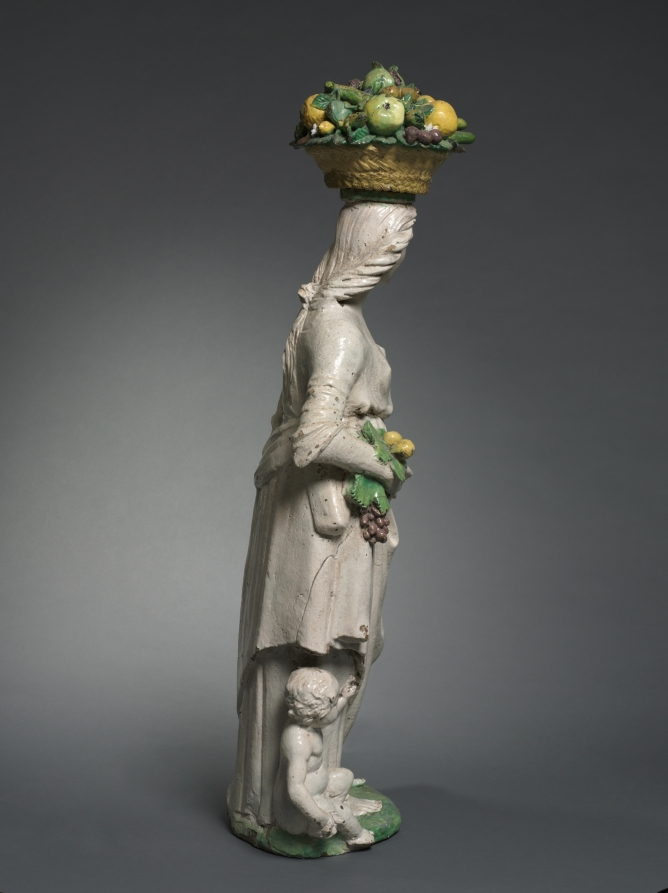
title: Dovizia (Plenty)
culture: Italy, Florence, 16th century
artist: Giovanni della Robbia (Italian, 1469–1529/30)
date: c. 1520–29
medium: glazed terracotta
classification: Sculpture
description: Many elite Florentine Renaissance homes had sculptures of idealized young women carrying nature’s bounty, such as this work. The motif stems from a statue by Donatello (about 1386–1466) that towered over Florence’s main public market. At home, however, the sculpture became a talisman for the family’s well-being. The city-state’s low birth rate was a serious political matter, and such a sculpture was believed to stimulate fertility while also promoting motherhood and bolstering financial success.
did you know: Inspired by an over life-sized, public sculpture by Donatello, Giovanni della Robbia reduced the figure for a domestic setting.